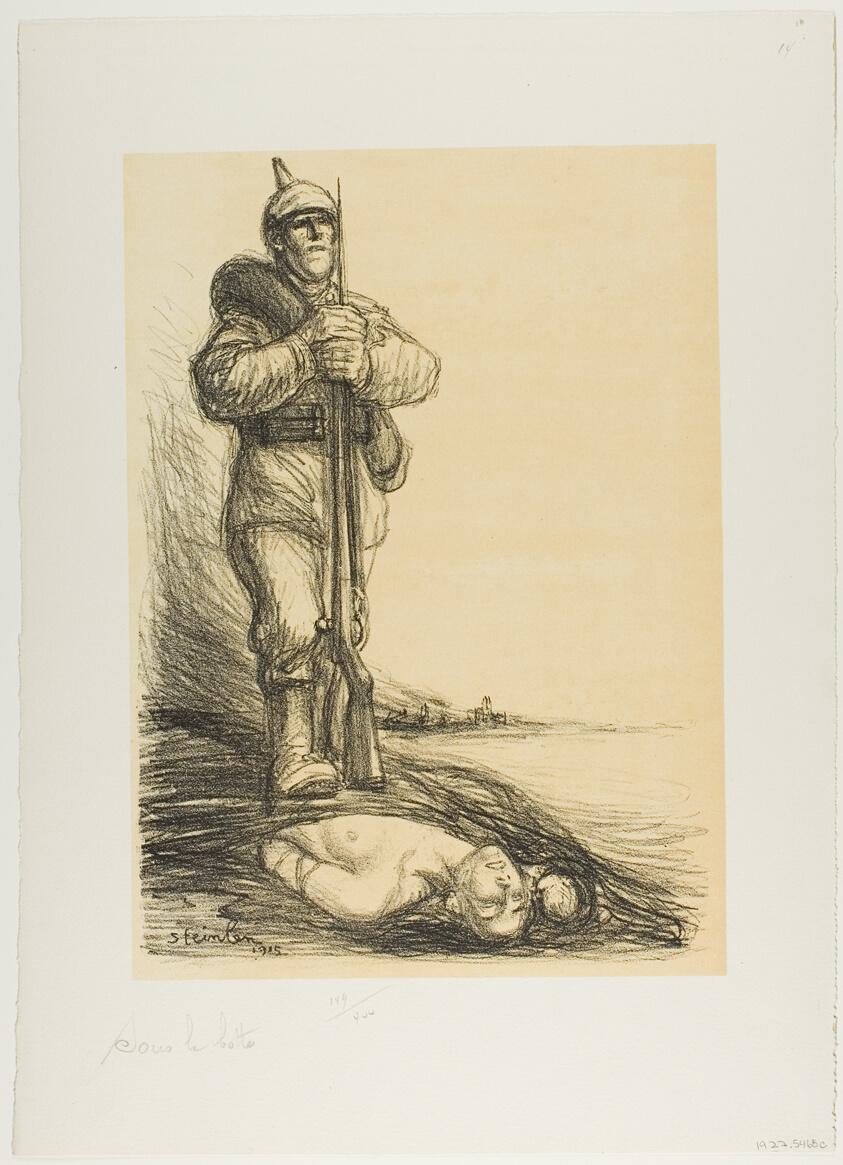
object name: Print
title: Under the Boot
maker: Théophile-Alexandre Steinlen; French, born Switzerland, 1859-1923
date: 1915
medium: Lithograph in black over a fawn tint on thick off-white wove paper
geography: France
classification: lithograph; print; prints and drawing